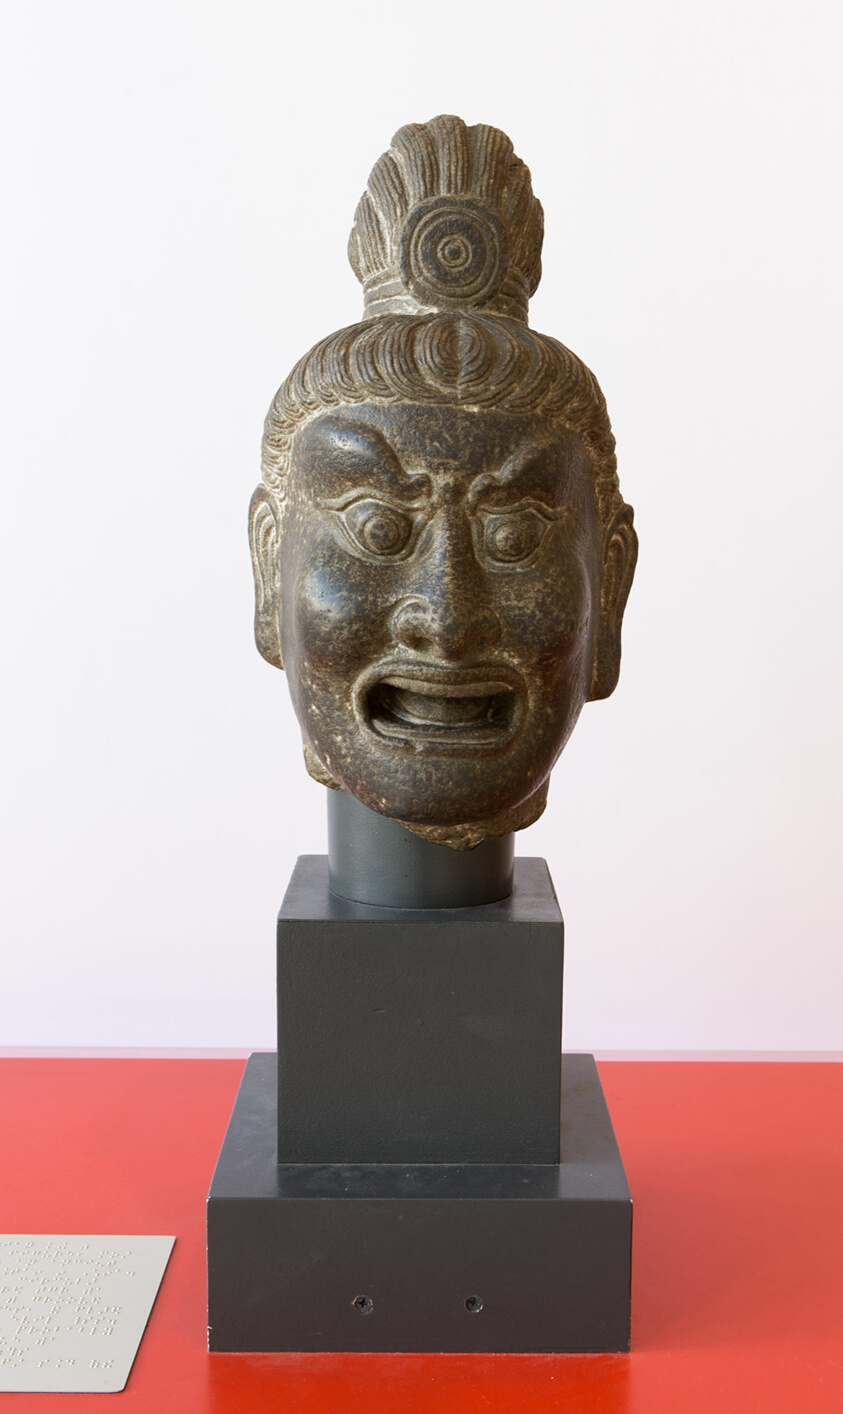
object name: Sculpture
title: Head of a Guardian King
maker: China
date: n.d., style of Tang dynasty (618–907)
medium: Granite or limestone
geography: China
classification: stone (unidentified); bust/head; stone; sculpture; asian art